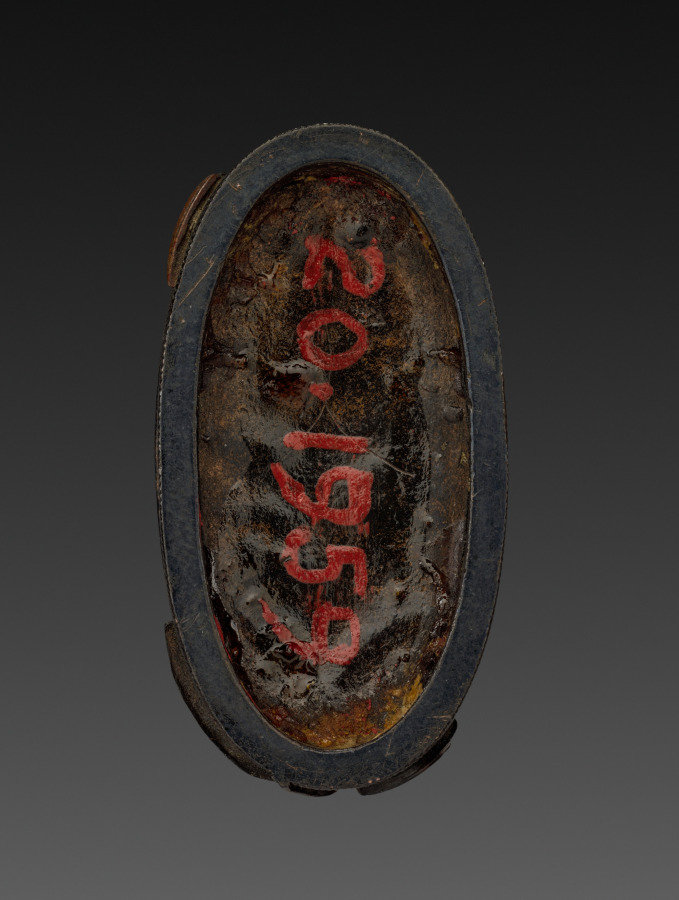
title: Sword-Hilt Pommel (Kashira)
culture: Japan, Edo period (1615–1868)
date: 1700–1850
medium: shakudo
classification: Arms and Armor